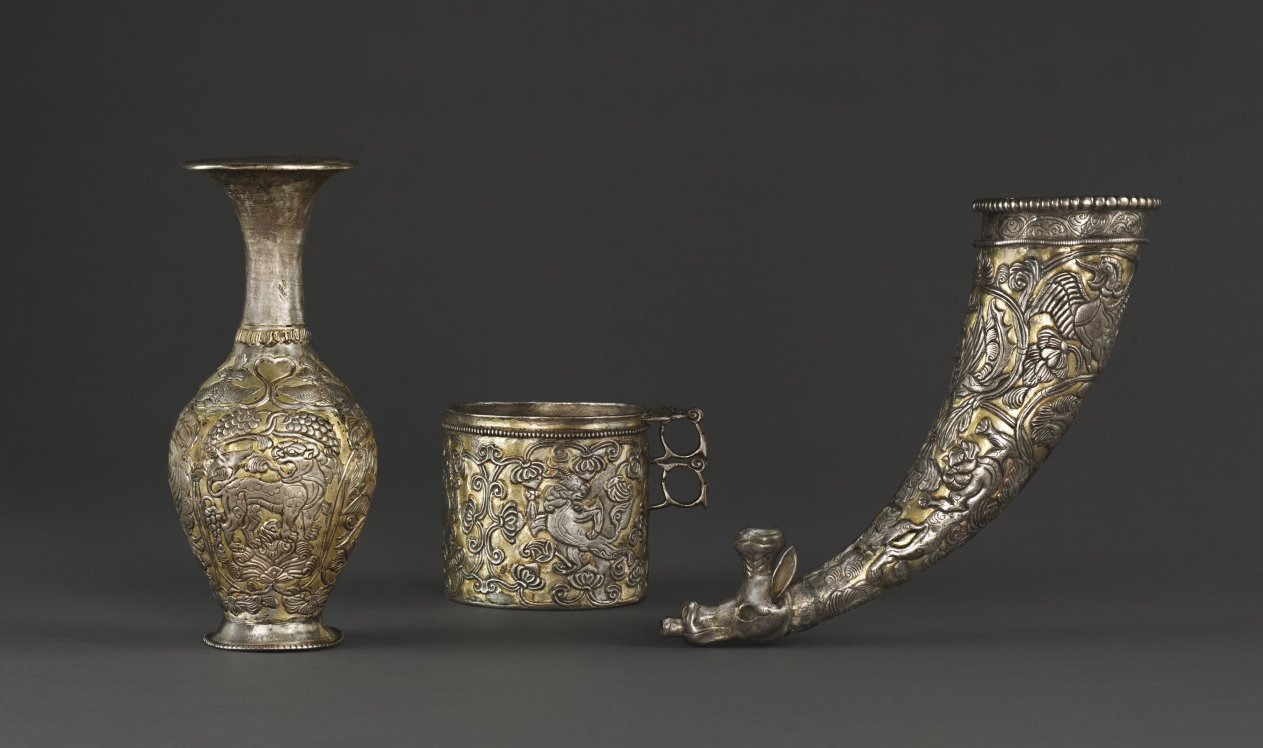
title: Vase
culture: Central Asia (Sogdiana) or Tibet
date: c. late 600s–early 700s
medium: silver with gilded foil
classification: Silver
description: Located amid the vast “silk roads” trade network, medieval Tibet was a place of dynamic cultural exchange. This decanter is evidence of such interactions. The vessel is part of the tableware used to hold wine during feasts. Tibetan elites adopted the tradition of consuming wine at social gatherings from their Iranian (Persian) contemporaries, whose wine banquets were lavish affairs with plentiful food and drink.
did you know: Lions were often seen as powerful protectors while phoenixes were associated with good fortune.